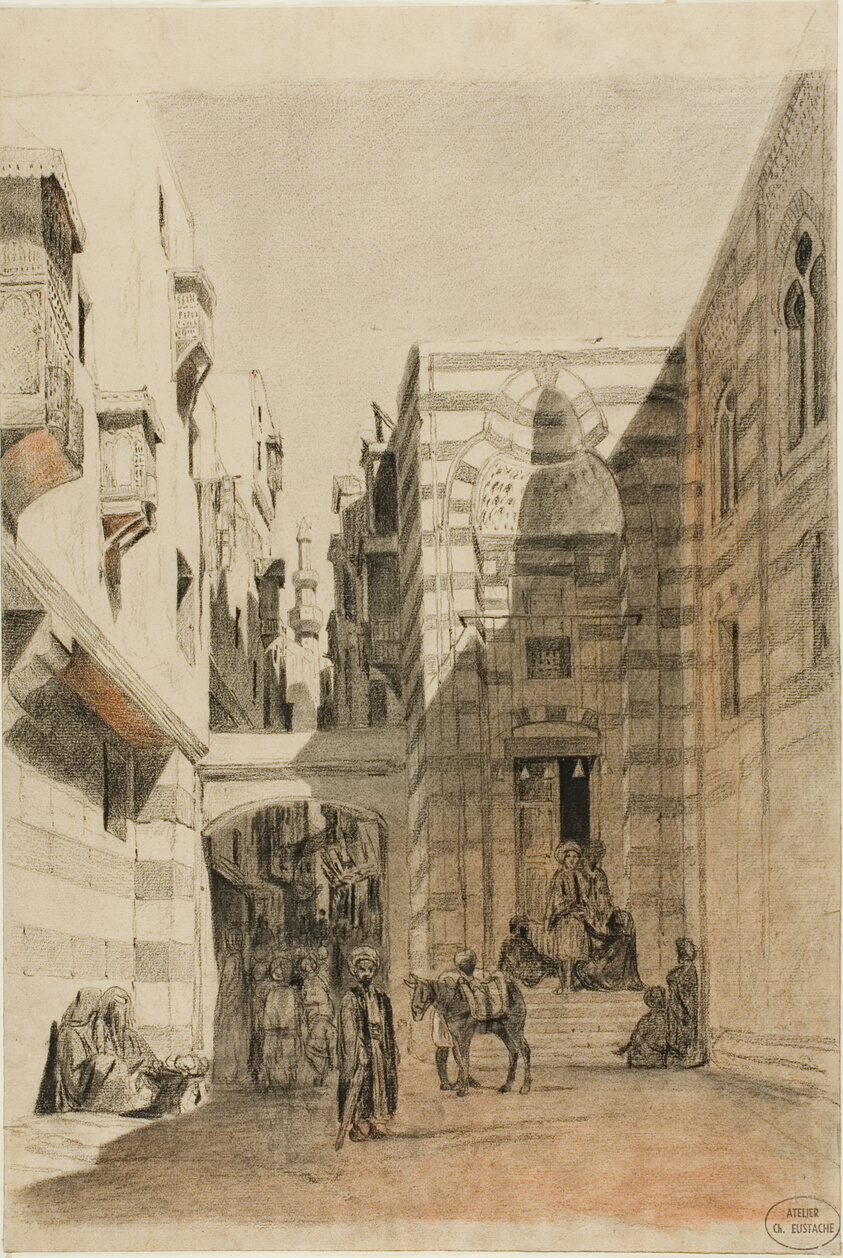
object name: Drawing and Watercolor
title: Egyptian Street Scene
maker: Charles François Eustache (French, 1820-1870)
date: 1842/47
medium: Black Conté crayon, with red chalk, graphite and stumping, on cream laid paper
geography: France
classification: conté crayon; drawings (visual works); prints and drawing